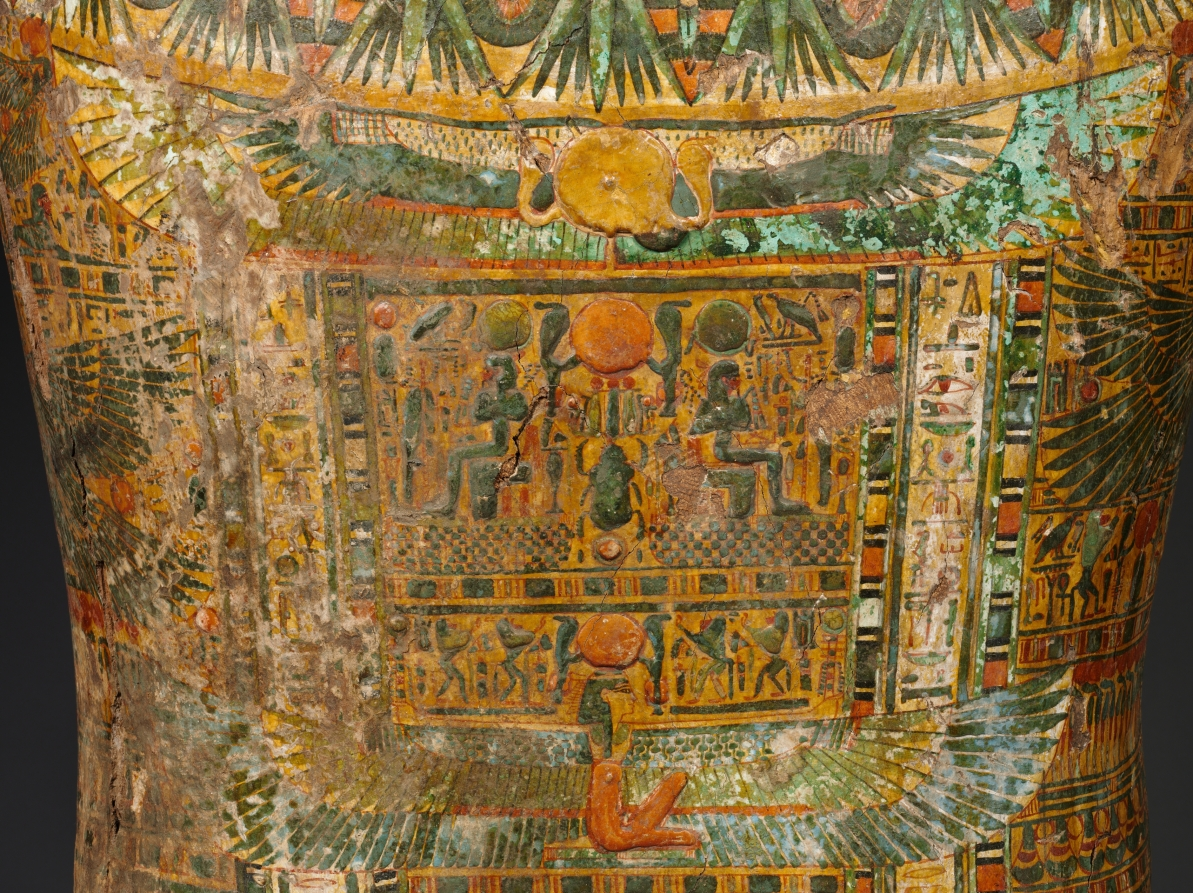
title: Coffin of Nesykhonsu (lid)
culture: Egypt, Third Intermediate (1069–715 BCE), Dynasties 21–22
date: c. 976–889 BCE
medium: gessoed and painted sycamore fig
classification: Funerary Equipment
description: A complete set of coffins during the late New Kingdom and Third Intermediate Period consisted of an outer and inner coffin and a mummy board (essentially a lid without a case, placed directly over the wrapped mummy). Judging by its size, this must have been Nesykhonsu's outer coffin. The type is essentially the same as the coffin of Bakenmut, which was also an outer coffin. The two coffins are said to have been found together and to have belonged to a man and wife. This is quite possible, although the inscriptions do not bear it out. Bakenmut is not mentioned on Nesykhonsu's coffin, nor is she mentioned on his. There was by this time a tremendous repertoire of scenes appropriate for coffin decoration. Whereas Bakenmut's coffin features images of deified dead pharaohs, Nesykhonsu's is decorated in a more personal way with scenes from her own funeral. The main scene in the interior (near the top) shows a priest clad in a panther skin with the mummy of Nesykhonsu behind. The god appears in mummy form and wears a sun disk on his head. The scarab beetle inside the sun disk identifies him as Khepri, the morning sun, and the hieroglyphs to the right identify him as Atum, the evening sun. Taken together, image and text represent the sun god in both his rising and setting, youthful and aged aspects.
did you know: Two of Nesykhonsu's titles, "Lady of the House" and "Singer of the Choir of Mut the Great," are written on the outside of the coffin.